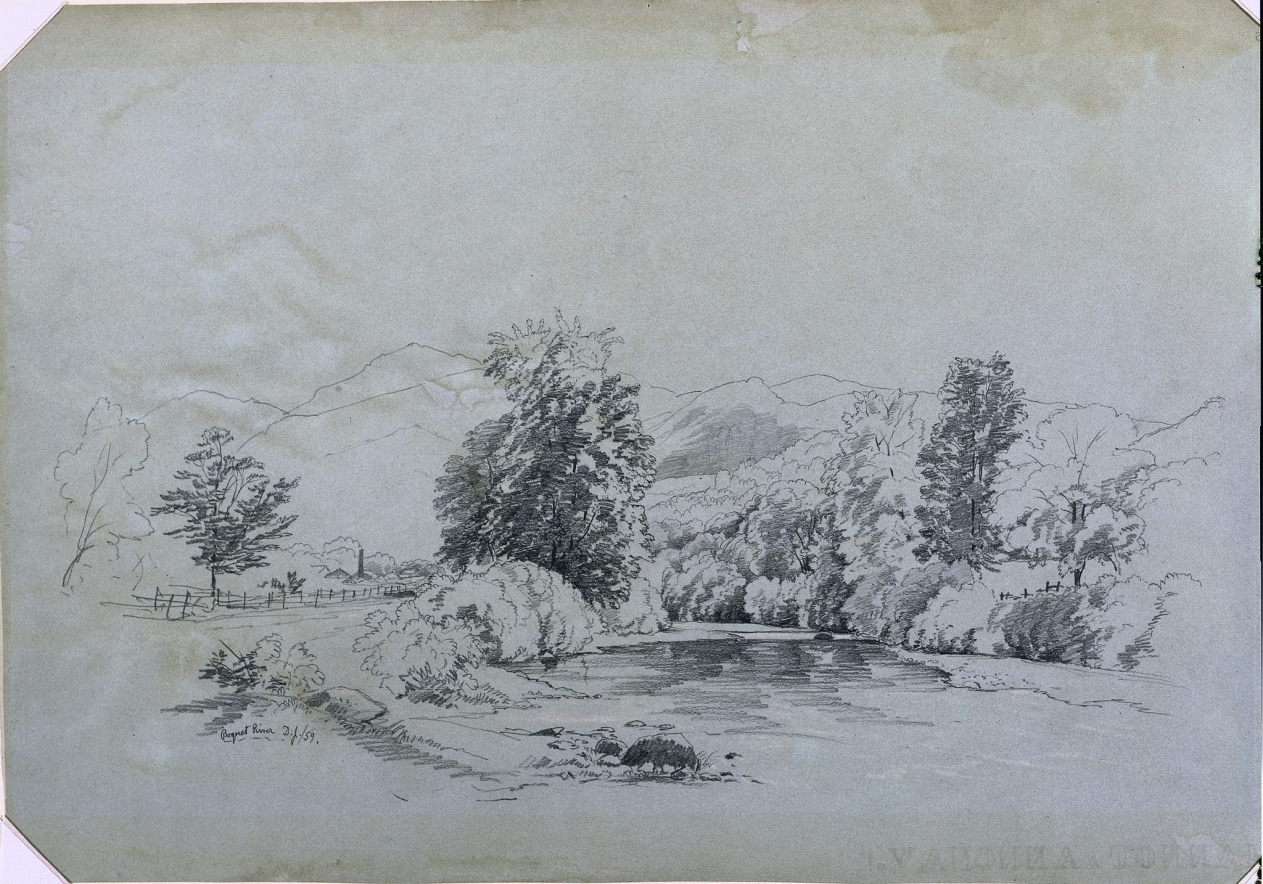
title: Boquet River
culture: America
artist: David Johnson (American, 1827–1908)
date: 1859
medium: Graphite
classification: Drawing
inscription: by artist, in graphite, ll: Bouquet River [underlined] D. J./59. ; verso, by unknown hand, in graphite, ul: 300 ; ur: 350. ; lr: 17022 / 22